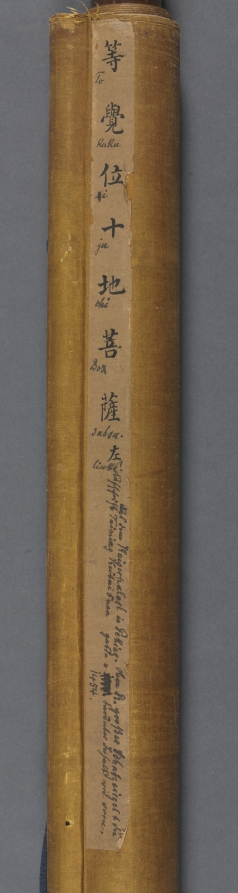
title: The Bodhisattvas of the Ten Stages in Attaining the Most Perfect Knowledge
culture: China, Ming dynasty (1368–1644)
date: 1454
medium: hanging scroll; ink and color on silk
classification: Painting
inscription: 大明景泰五年八月初三日施 [印] 廣運之寳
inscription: 御用監太監尚義王勤等奉命提督監造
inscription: 等覺位十地菩薩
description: This painting represents bodhisattvas of the 10 stages of enlightenment undergoing the final processes toward Buddhahood. This and CMA 1973.70.2 form part of a set of scrolls that were used to perform the Water-Land (shuilu) ritual. The sinuous curves of scarf and drapery, the layering of garments, and the minute detail all reflect the opulent visual atmosphere that surrounded the Ming worshipper in temples and spirit halls throughout the country. In the upper right corner of each painting is an imperial seal and an inscription in gold: Donated on the third day of the eighth month in the fifth year of the Jingtai reign (1454) of the Great Ming. Written in ink in the lower left corner is the record that they were made on imperial order, probably to present them to the Da Longfu monastery in Beijing.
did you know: This painting was used in the grandest of the Buddhist mortuary rites, the Water-Land (shuilu) ritual, which was conducted for the salvation of “all souls of the dead on land and sea.”